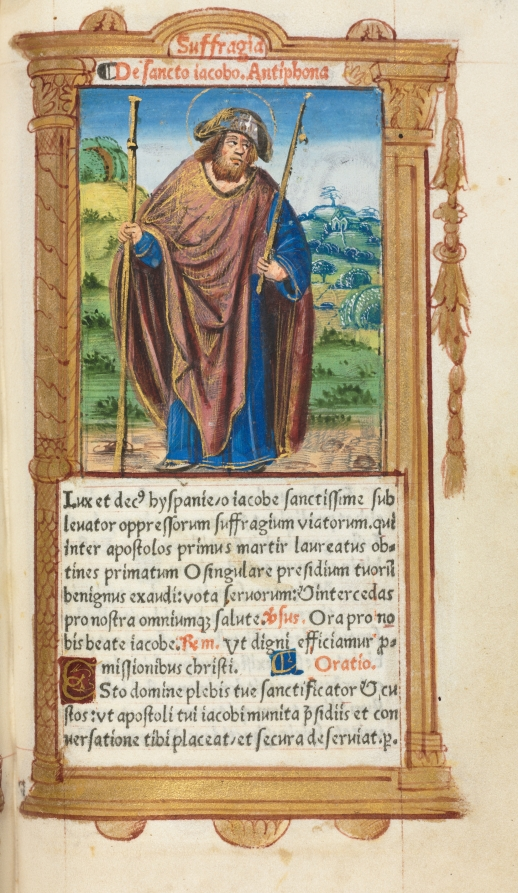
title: Printed Book of Hours (Use of Rome): fol. 100r, St. James the Greater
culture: France, Paris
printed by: Guillaume Le Rouge (French, Paris, active 1493–1517)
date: 1510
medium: 112 Printed folios on parchment, bound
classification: Bound Volume